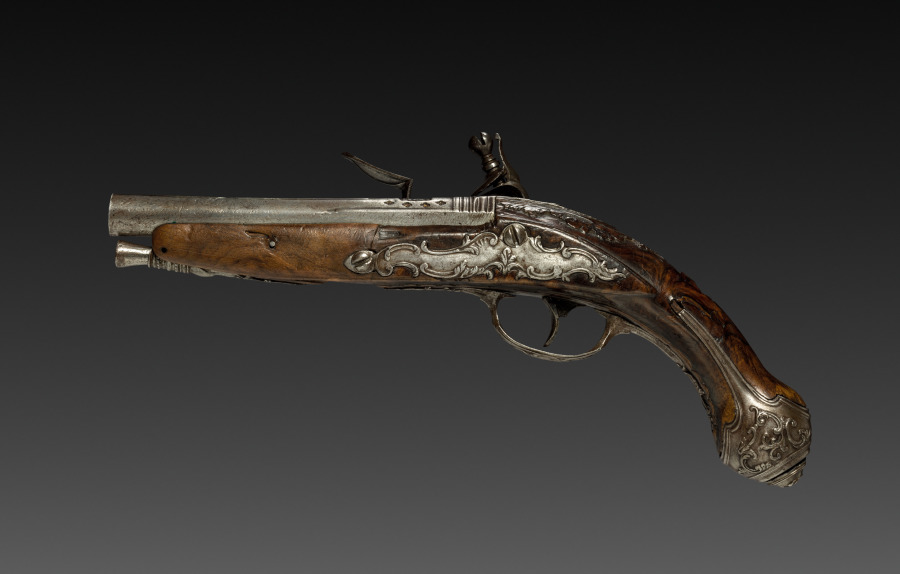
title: Flintlock Pistol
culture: Italy, Brescia, 18th century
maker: Bortolo Agazzi (Italian)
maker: Lazaro Lazarino (Italian)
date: 1700s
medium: steel with traces of gilding; walnut stock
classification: Arms and Armor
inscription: on lock: Bortolo Agazzi; on barrel: Lazaro Lazarino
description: The flintlock was the most popular style of lock in all of Europe in the mid 1600s through the 1700s except in Spain and Italy where the snaphance was more dominant. This pistol's shine comes from the gold that was applied to the steel shaft. This shiny surface is set off by the rich walnut stock. Upon close inspection, you can see areas of damage to the walnut and even a missing section of decoration on the rear of the handle.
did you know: The term flintlock is used to describe any firearm that uses a flint-striking ignition mechanism.